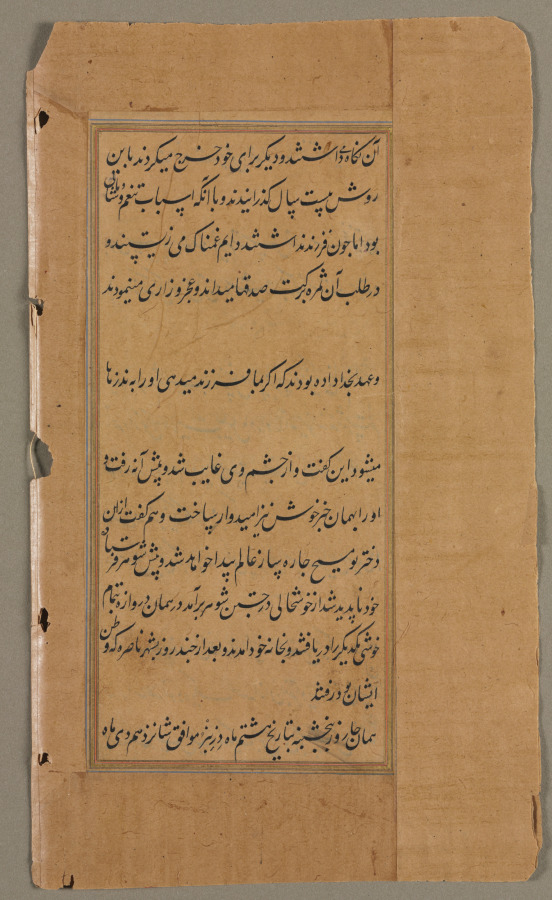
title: Text, Folio 6 (verso), from a Mirror of Holiness (Mir’at al-quds) of Father Jerome Xavier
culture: Mughal India, Allahabad, made for Prince Salim (1569–1627)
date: 1602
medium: Ink and gold on paper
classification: Manuscript